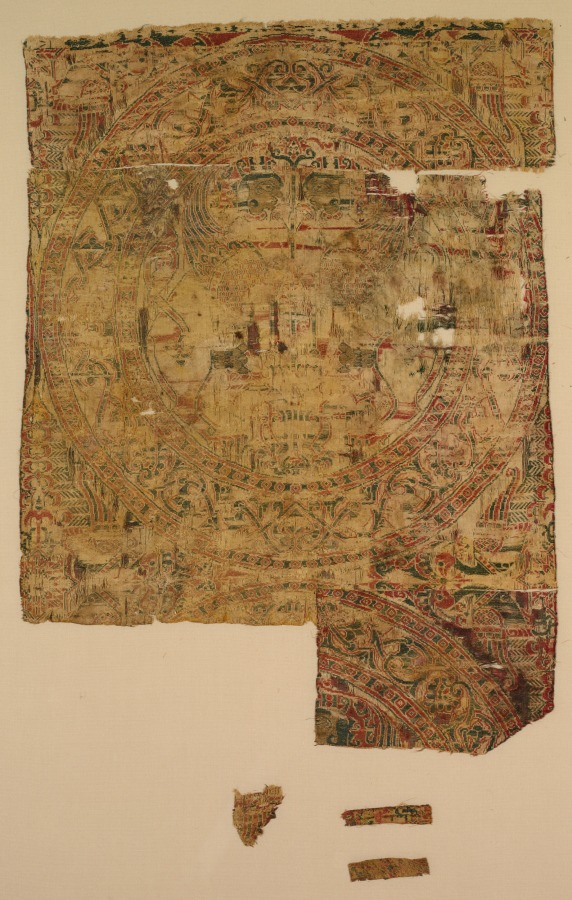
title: Fragment with confronted sphinxes in roundels from the tomb of Saint Bernard Calvo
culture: Spain, Almeria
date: 1200–43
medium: Silk and gold thread: lampas, taqueté, and plain-weave variant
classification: Textile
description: Composite creatures, such as winged lions and sphinxes, predate the rise of Islam in the Arabian Peninsula. Islamic textiles continued to include them for centuries after the Arab conquest of Spain. Pairs of lions with gold faces rear up to bite the haunches of the winged beasts. In between the roundels are pairs of peacocks, motifs traceable to pre-Islamic Persian art that spread throughout the Islamic world, including Spain. The body of Saint Bernard Calvo, the Catholic Bishop of Vich in 1233–43, was wrapped in textiles, including these fragments that still retain traces of his blood.